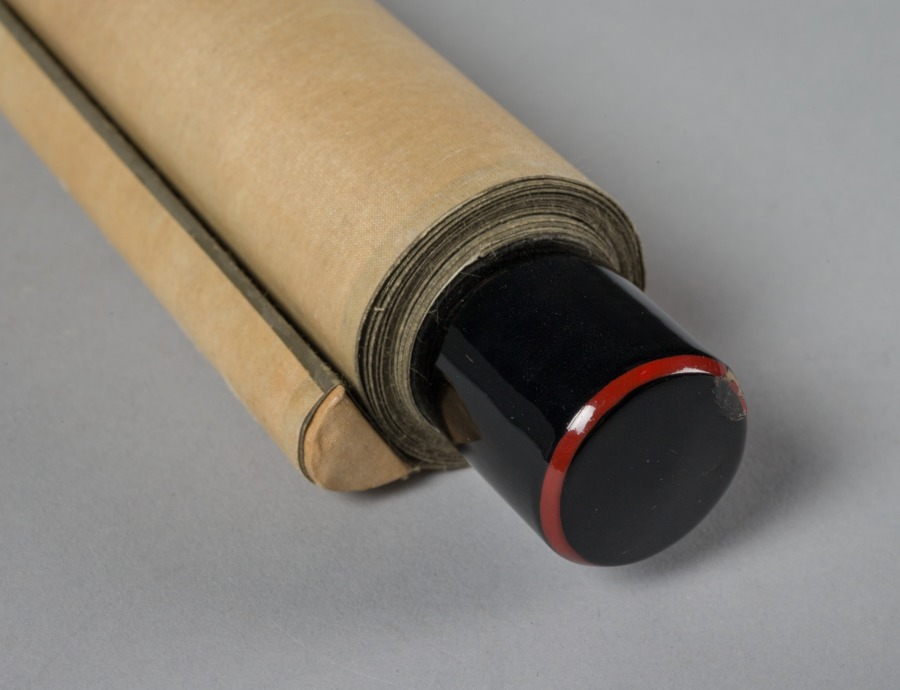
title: Twelve Buddhas and Kobo Daishi (Jusanbutsu)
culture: Japan, Edo period (1615–1868)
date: late 1600s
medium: stencil print (Kappa-zuri); ink and color on paper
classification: Print